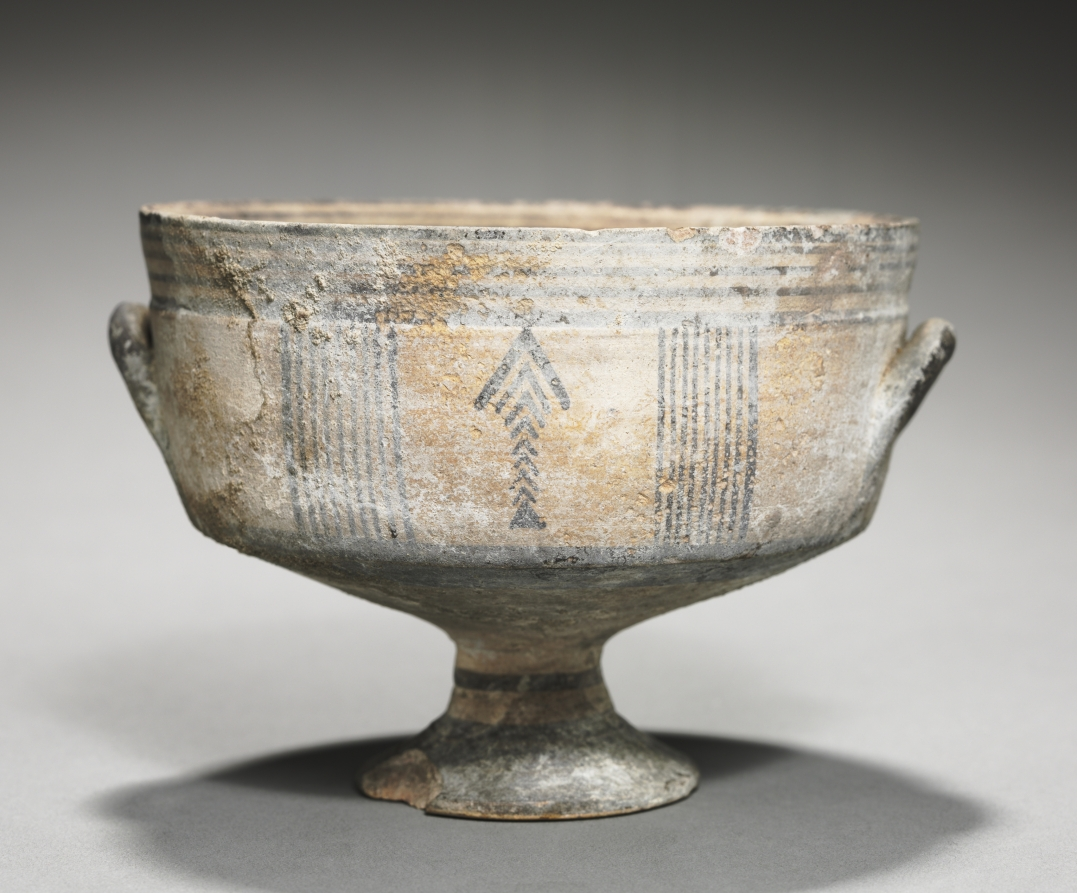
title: Footed Bowl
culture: Cyprus, Cypro-Geometric III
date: c. 850–750 BCE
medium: white painted ware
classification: Ceramic